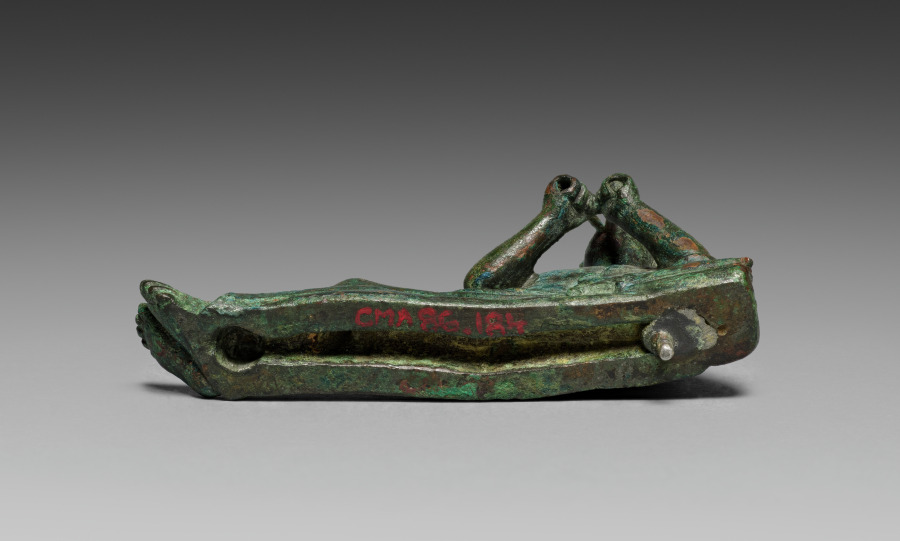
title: Vessel Ornament of Reclining Pipes Player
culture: Etruscan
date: probably 400–375 BCE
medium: bronze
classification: Sculpture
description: This bronze banqueter figurine was one of six once adorning the rim of a large basin, now lost. Cast in molds with individualized details, most have grooves on their underside to attach to the basin. Minute traces of gilding remain on areas of clothing and skin (mostly visible only under magnification), suggesting that they may have been completely gilded. Two handles in the form of hippocampi, horses with serpentine tails, also belonged to the basin and are now displayed at the Michael C. Carlos Museum at Emory University. The basin may have been used to hold liquid for a banquet, or was perhaps funerary. This bronze reclining figurine raises his head and blows into a set of pipes. The tips of the pipes are broken off. Some gilding remains on the mouth and chin. The figurine wears a himation over his body and has a bare chest. Two pillows prop up his left elbow. His hair falls over his forehead in square bangs.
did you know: Guests were often invited to play instruments and sing during symposia.